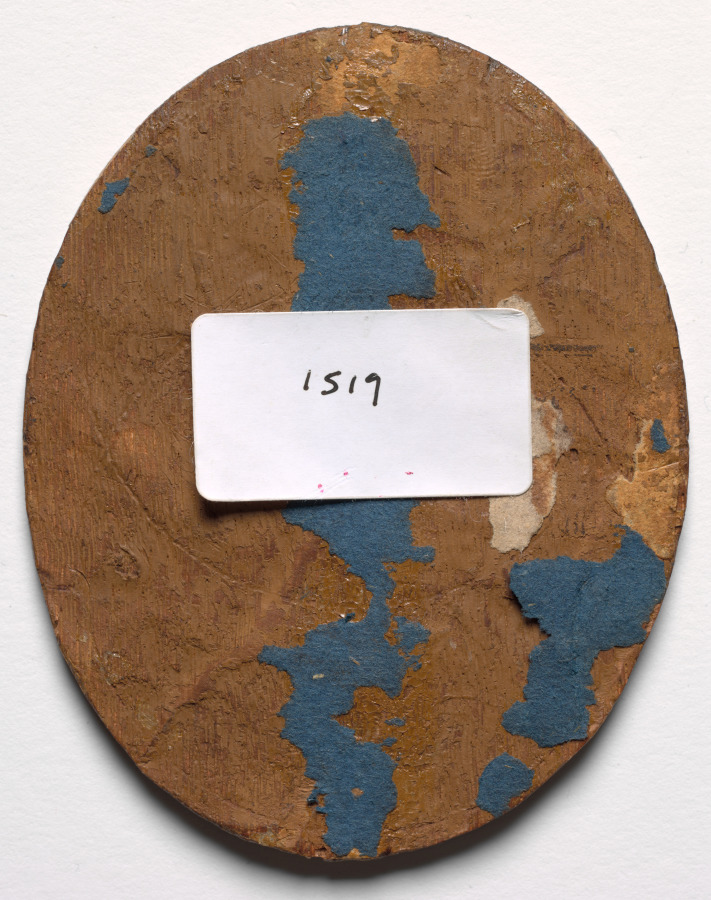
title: Portrait of a Man Holding a Watch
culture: Netherlands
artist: Pieter Cornelisz van Slingelandt (Dutch)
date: c. 1665–70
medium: oil on wood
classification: Painting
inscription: signed with monogram at right, lower center: PVS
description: Held in the hand or displayed in a private domestic space, miniature portraits were designed for intimate viewing. The sitter holds a watch, often a symbol of mortality and the passage of time. Like his colleague Gerrit Dou, Slingelandt was one of the Leiden fijnschilders (fine painters), a group of artists whose paintings were internationally recognized for their extraordinary detail and precise technique.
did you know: The domed building in the background of this portrait is the Marekerk, one of Leiden's most distinctive architectural landmarks.